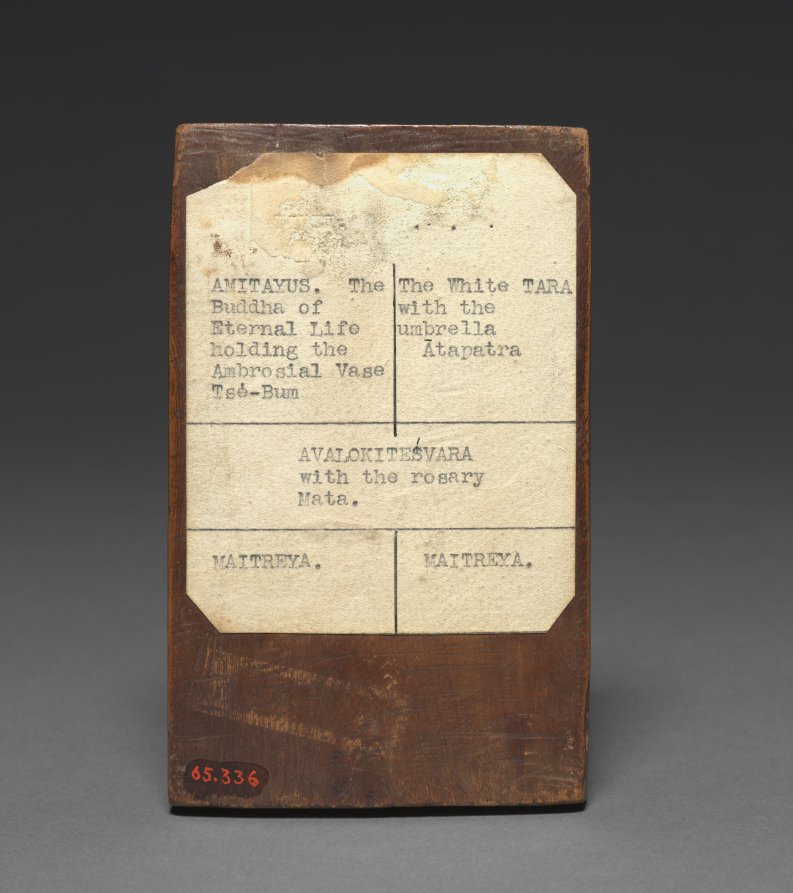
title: Sadaksari-Lokesvara Mandala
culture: Tibet, Ming dynasty (1368-1644)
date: c. 1475–1525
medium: wood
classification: Sculpture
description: A quintet of Buddhist divinities are seated on lotus thrones supported by scrolling floral forms. They are carved in relief on a wooden block and arranged diagrammatically. This configuration establishes the icon to be a mandala.